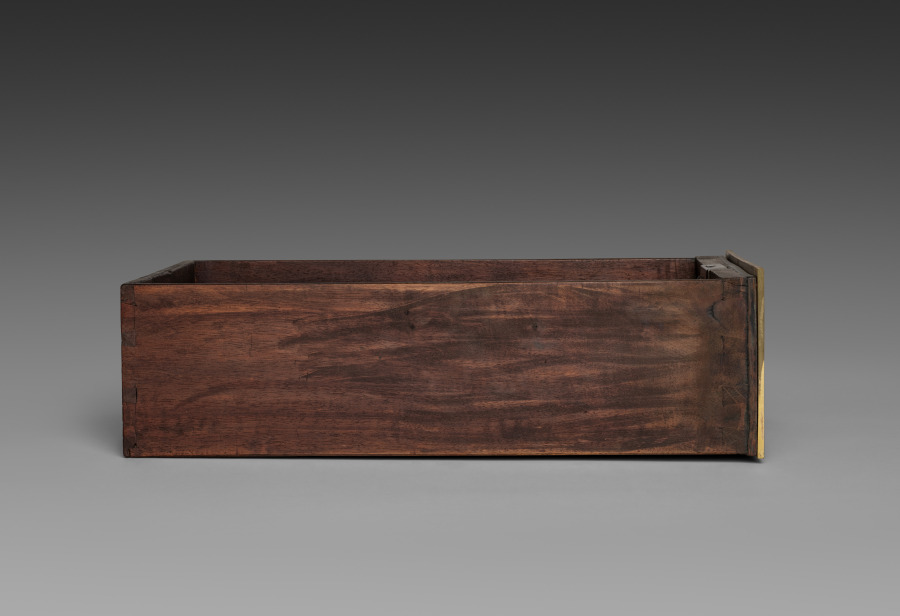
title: Side Drawer for Cabinet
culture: France, late 17th Century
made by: André-Charles Boulle (French, 1642–1732)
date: c. 1690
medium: ebony, marquetry in metal and tortoise shell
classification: Furniture and woodwork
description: Appointed cabinetmaker to King Louis XIV in 1672, André-Charles Boulle became a master of furniture making in France during the late 1600s until his death in 1732. Known primarily for his use of marquetry, in which metal patterns are inlaid into tortoiseshell then applied within the veneered surface of the furniture, Boulle established a level of quality and craftsmanship few others could achieve. As a result, his work found favor at the royal court and among other aristocrats and diplomats eager to impress the king. The inclusion of a medallion depicting Louis XIV within the bronze decoration of this chest would have identified the owner with the royal court. Often exhibiting stout architectural proportions with elegant groups of inlaid motifs such as the parrot on the central panel of this chest, Boulle’s designs are an example of the intellectual fashion for contrasting ideas, materials, and motifs.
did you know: Originally designed to sit atop an elaborate tall stand, this chest was likely altered in the late 1700s to reduce its scale and height.